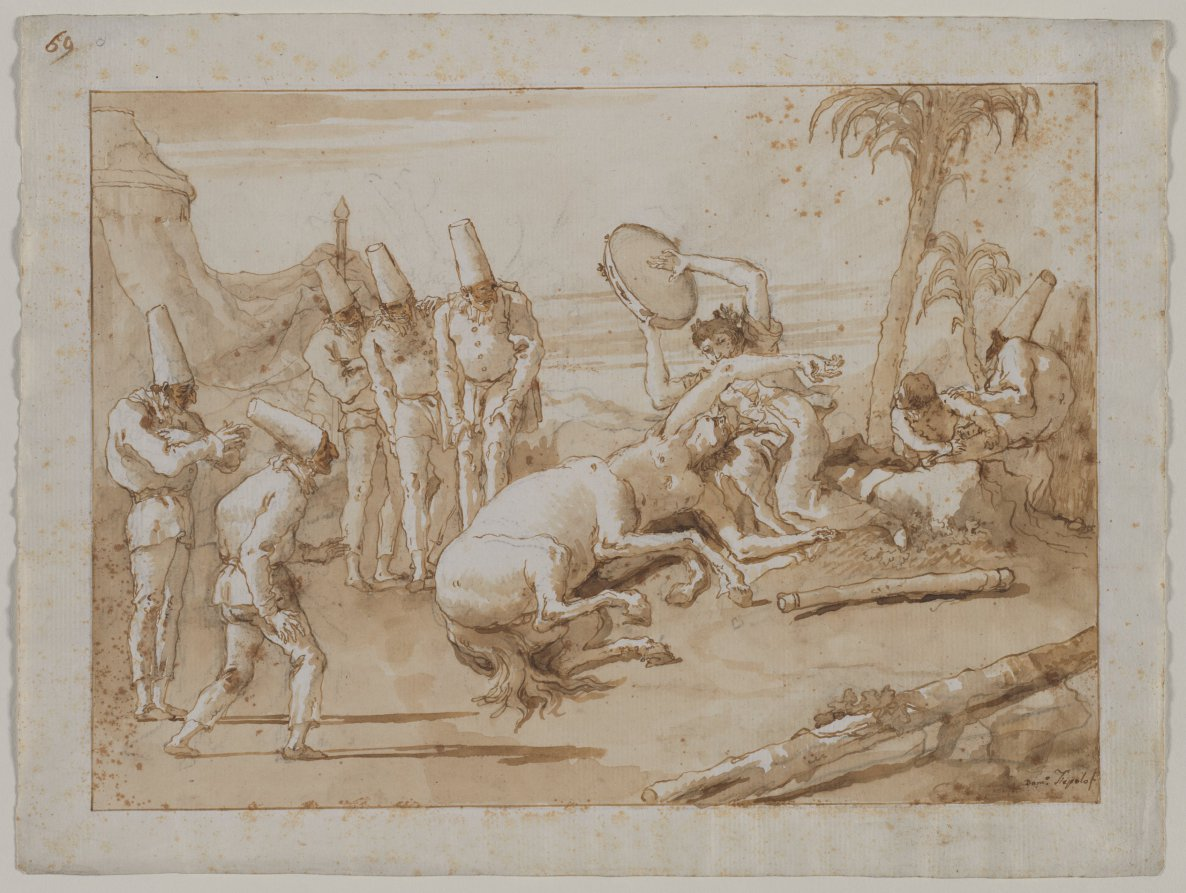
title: The Woman with a Tambourine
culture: Italy, 18th century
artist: Giovanni Domenico Tiepolo (Italian, 1727–1804)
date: 1790s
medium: pen and brown ink and brush and brown wash, over black chalk; framing lines in pen and brown ink over graphite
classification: Drawing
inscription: signed, lower right, in brown ink: Dom°. Tiepolo f ; upper left, in brown ink: 69 [6 was changed from a 5 in original ink) ; upper left, in graphite: o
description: Observed by Punchinello and friends, a centaur is subdued by a maiden’s musical charms. Rendered touchingly vulnerable, the creature lies with its head on the girl’s lap. One of the simplest instruments, the tambourine was typically played by itinerant musicians—nymphs, vagabonds, seducers—and was traditionally considered the quintessential attribute of the outsider, an aspect reinforced in the 20th century by Bob Dylan’s "Mr. Tambourine Man."